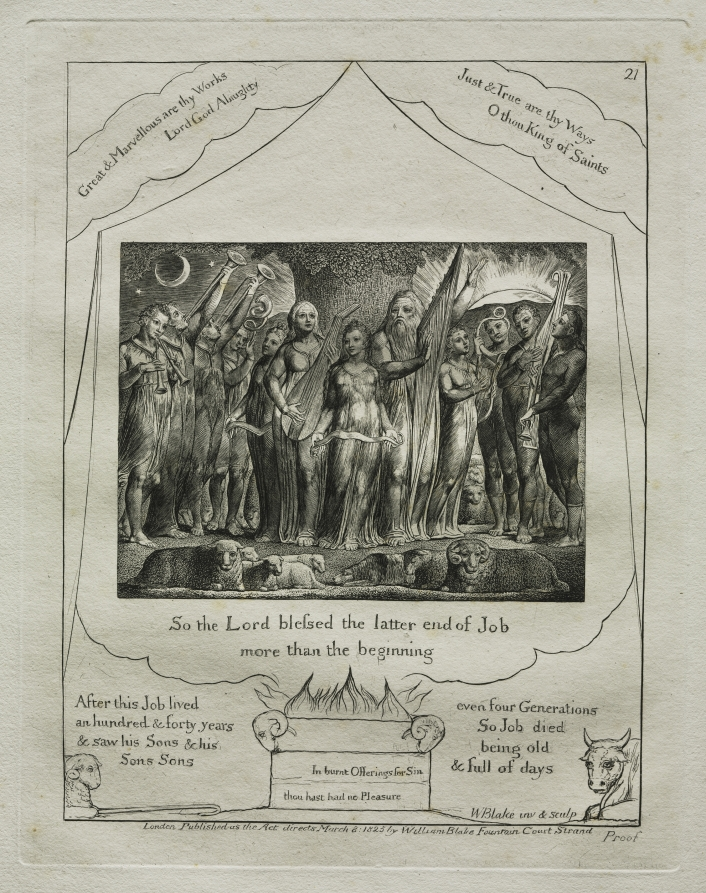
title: The Book of Job: Pl. 21, So the Lord blessed the latter end of Job / more than the beginning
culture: England, 18th century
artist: William Blake (British, 1757–1827)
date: 1825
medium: engraving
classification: Portfolio